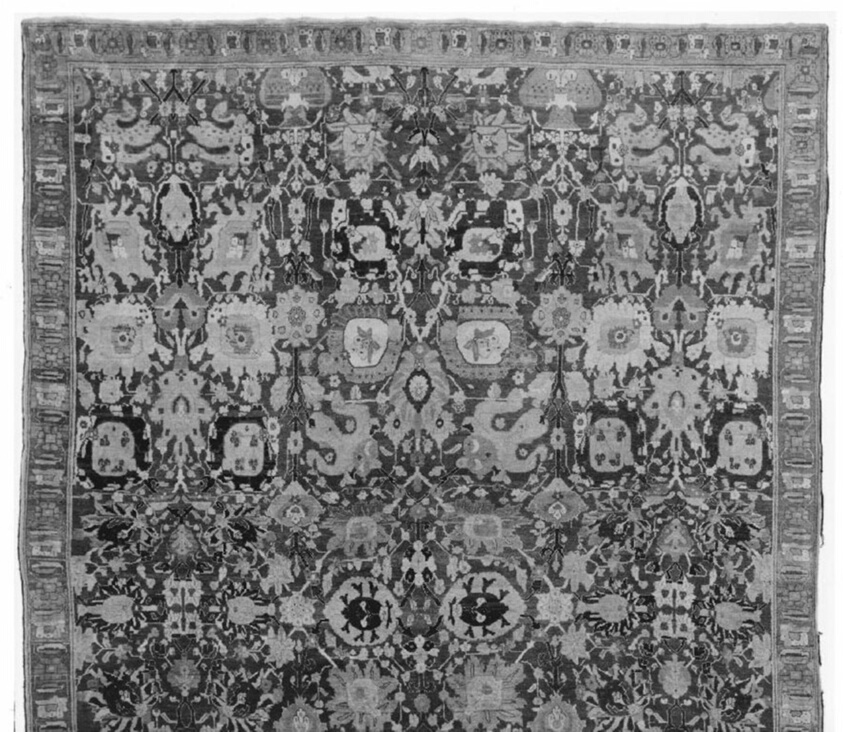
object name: Textile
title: Carpet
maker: India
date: 1801/50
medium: Cotton and wool, plain weave with supplementary wrapping wefts forming cut pile through a technique known as "Persian (Sehna) knots"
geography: India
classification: textile; weaving - carpet